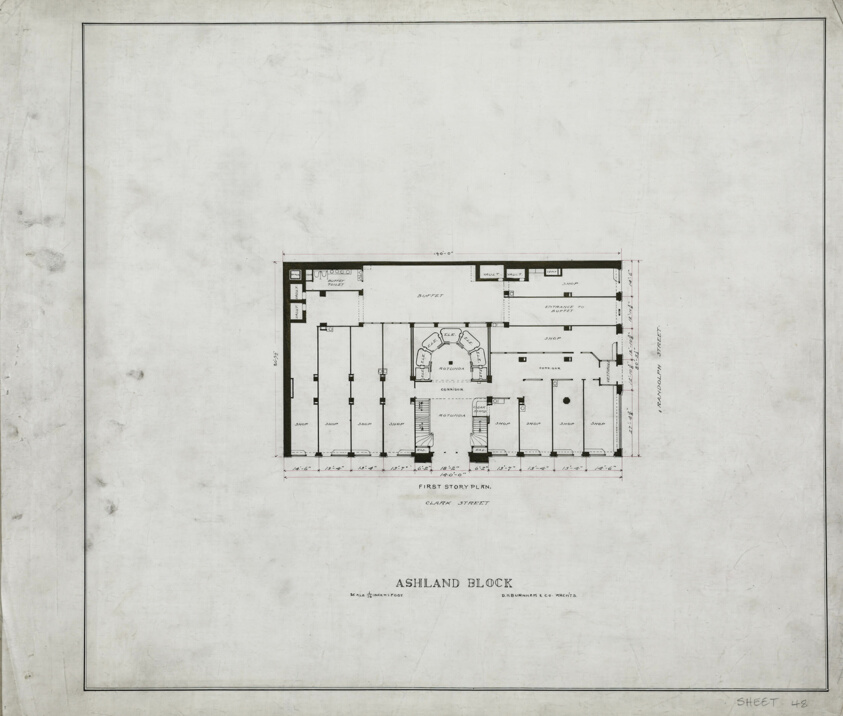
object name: Architectural Drawing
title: Ashland Block, Chicago, Illinois, Floor Plans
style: 19th century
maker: D.H. Burnham & Company; American, 1891–1912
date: c. 1892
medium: Black and red ink on linen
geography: Chicago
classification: architectural drawing; architecture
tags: Chicago, architecture